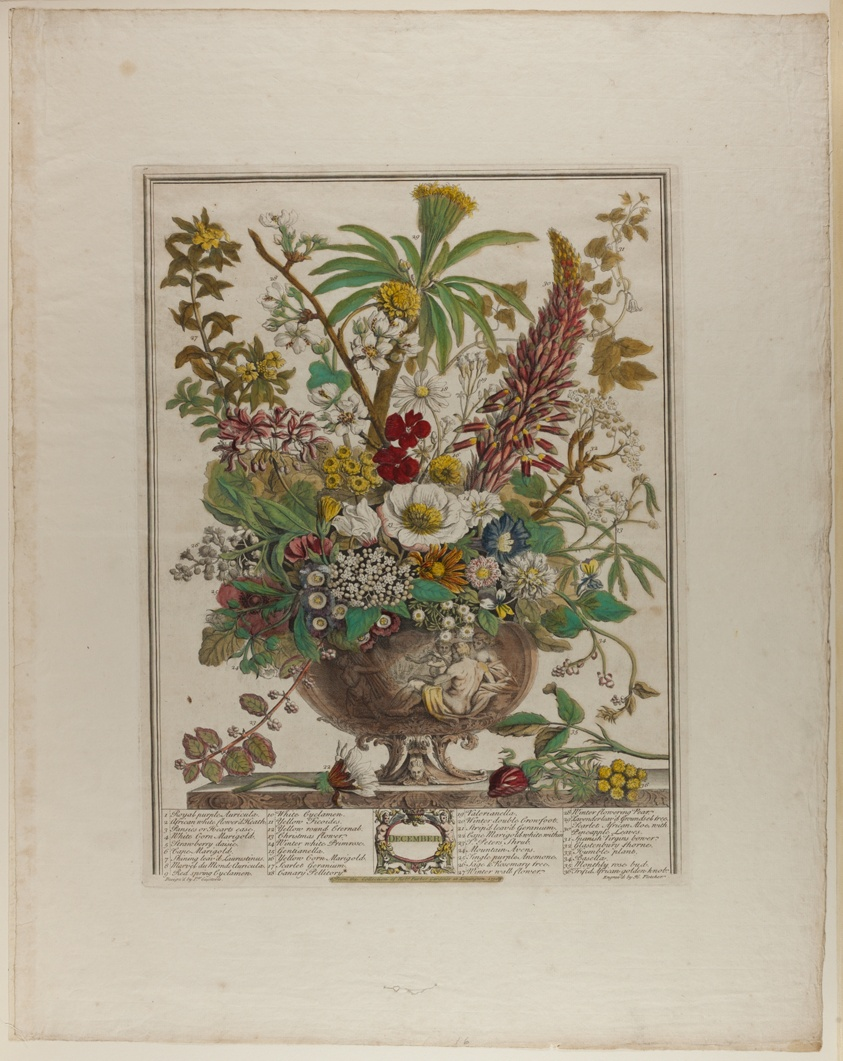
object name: Print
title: December, from Twelve Months of Flowers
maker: Henry Fletcher (English, 1710-1750); after Peter Casteels III (Flemish, 1684-1749)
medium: Engraving in black ink with opaque and translucent watercolor on cream laid paper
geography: England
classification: etching; print; prints and drawing